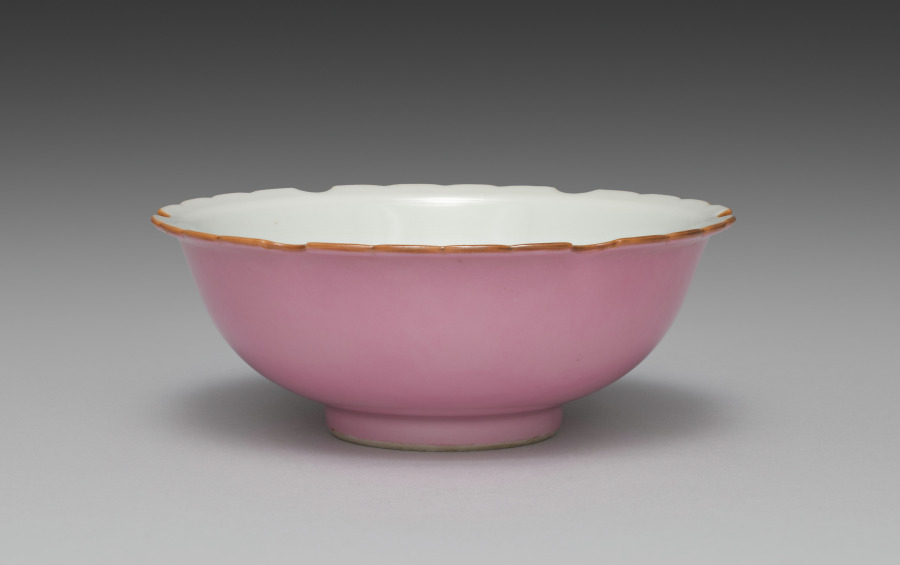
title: Dish from Snow-Flake Side Dishes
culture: Japan, Meiji period (1868–1912)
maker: Seifū Yohei III (Japanese, 1851–1914)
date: 1893–1914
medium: One from a set of six porcelain dishes; porcelain with lobed rims and pink glaze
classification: Ceramic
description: According to the box lid, this set of 6 side dishes, or mukōzuke, are “snow-flower style” (sekkashiki), having mouths shaped like snowflakes. Their mouths, which have 6 lobes and scalloped edges, are traced with brown iron oxide at the rim. The outside of each bowl is glazed with a very bright pink over the basin and foot, and the inside is left white. From directly above, one sees a snowflake-like shape, and from the side, they seem to float above a rosy ground.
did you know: The box for this set of dishes has an inscription on the side noting that they were for a person with the family name Nakamoto.